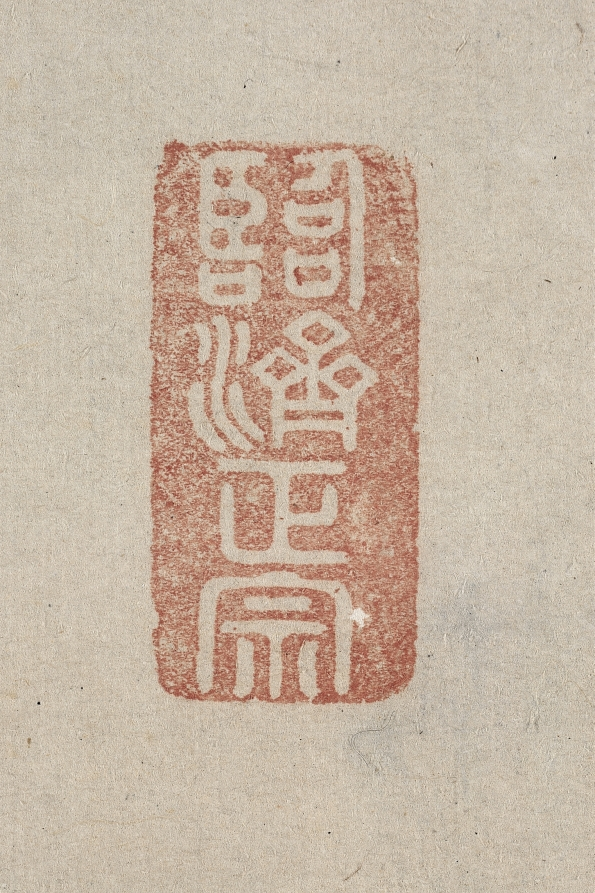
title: Calligraphy in Semi-Cursive Style (xing-caoshu)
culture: China, Qing dynasty (1644-1911)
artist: Yueshan Daozong (Chinese, 1629–1709)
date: c. 1660–1709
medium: hanging scroll; ink on paper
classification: Calligraphy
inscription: 吟風一樣松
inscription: 悅山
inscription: 道宗之印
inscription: Linji zheng zong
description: This bold calligraphy written by Yueshan, an Ōbaku school monk, consists of five characters tentatively translated as “Pine trees singing in the wind.” The line is from Cold Mountain Poems (Hanshan shi). Cold Mountain is the pen name (hao) of the poet monk Han Shan, as well as the name of a place. In one poem Han describes getting lost on the road to Cold Mountain, perhaps an allusion to the search for religious enlightenment.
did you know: The Ōbaku school of Chan (Zen in Japanese) Buddhism was founded in Japan by Chinese monks in the 1600s. The monk Yueshan emigrated from the Chinese province of Fujian to serve as priest and later abbot at Manpukuji, the headquarters of the Ōbaku school in Japan.